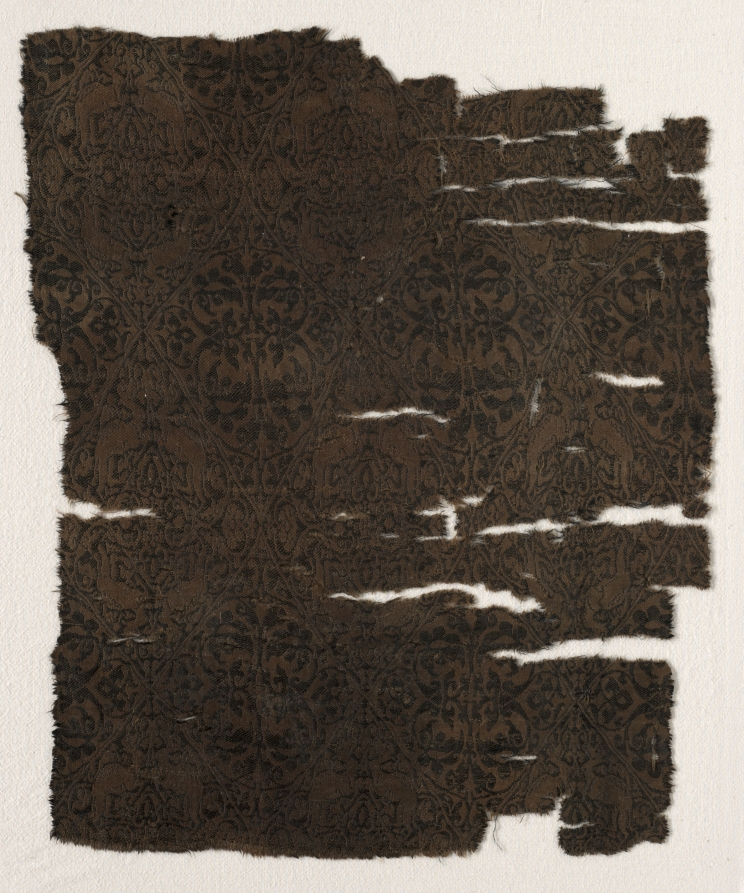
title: Fragment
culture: Iran or Iraq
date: before 1968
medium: Silk: compound twill weave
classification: Textile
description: This fragment's overall lozenge grid has alternate rows of two opposed pairs of confronted camels on a densely foliated ground flanking a central ornamented diamond that encloses four-directional palmettes in deep golden tan on a dark blue-green ground, and symmetrical pairs of opposed floral vines in dark blue-green on a deep golden tan ground.